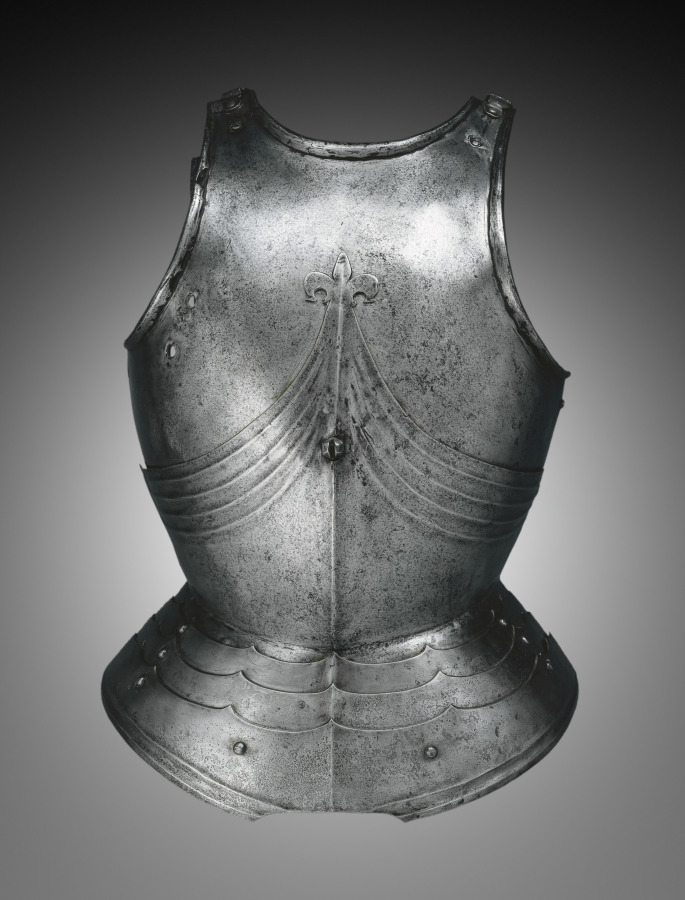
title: Gothic Breastplate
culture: South Germany or Austria, Innsbruck, late 15th century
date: late 1400s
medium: steel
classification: Arms and Armor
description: This elegantly constructed breastplate consists of two primary plates of steel fastened at center by a rivet. The lower plate is embellished with a border of embossed flutes that converge upward and terminate in a fleur-de-lys. The pair of rivet holes in the upper right breast accommodated a lance rest, now lost.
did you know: As a result of the introduction of plate armor, the shield became superfluous and gradually disappeared from use.